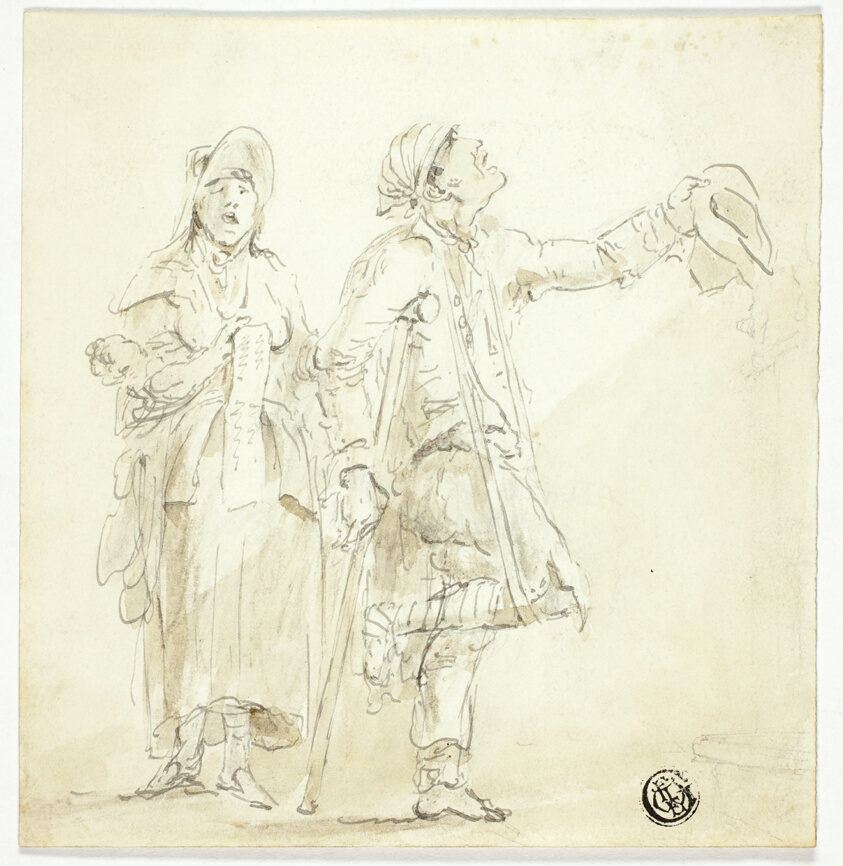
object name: Drawing and Watercolor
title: Man on Crutches Begging, with Woman Singing and Holding Baby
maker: Unknown Artist; British or French, 18th century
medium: Pen and gray ink, with brush and brown wash, over traces of black chalk, on ivory wove paper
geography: England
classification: pen and ink drawings; drawings (visual works); prints and drawing